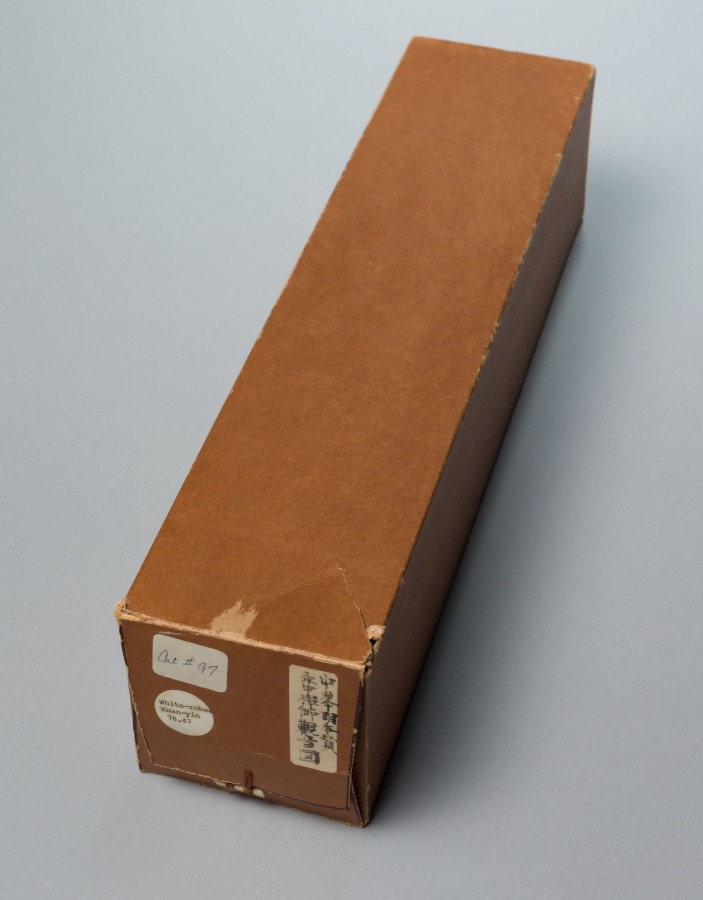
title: White-Robed Guanyin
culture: China, Yuan dynasty (1271-1368)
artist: Jueji Yongzhong (Chinese, active around 1300)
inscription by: Zhongfeng Mingben (Chinese, 1263–1323)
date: late 1200s–early 1300s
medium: hanging scroll; ink on paper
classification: Painting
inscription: Artist's signature: Huanzhu Yongzhong. Inscription by Zhongfeng Mingben: The right thinking [Samkalpa] is embodied within His deep meditation on the Buddha [naga-samadhi]. Retaining not even one single object of thought, A perfect harmony was wonderfully achieved. In the endless time and space, His all-embracing compassion prevails. [signed] Mingben of Huanzhu paying his respects.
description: Guanyin, the bodhisattva of infinite compassion (Avalokiteshvara, in Sanskrit), reveals himself in many forms. According to Buddhist belief, one such manifestation is the white-robed Guanyin sitting on a rock on the island of Putuo (Potalaka, in Sanskrit), located along the coast not far from Ningbo, in Zhejiang Province, China. Here, the figure was swiftly drawn in only a few ink lines. The inscription above is by Zhongfeng Mingben, perhaps the most widely respected and influential Chan (Zen in Japanese) master in the Yuan dynasty. The artist’s signature is a single line below on the left: Huanzhu Yongzhong.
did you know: The CMA collection includes a drawing by a Japanese priest, CMA 1978.47.2, inspired by this composition.